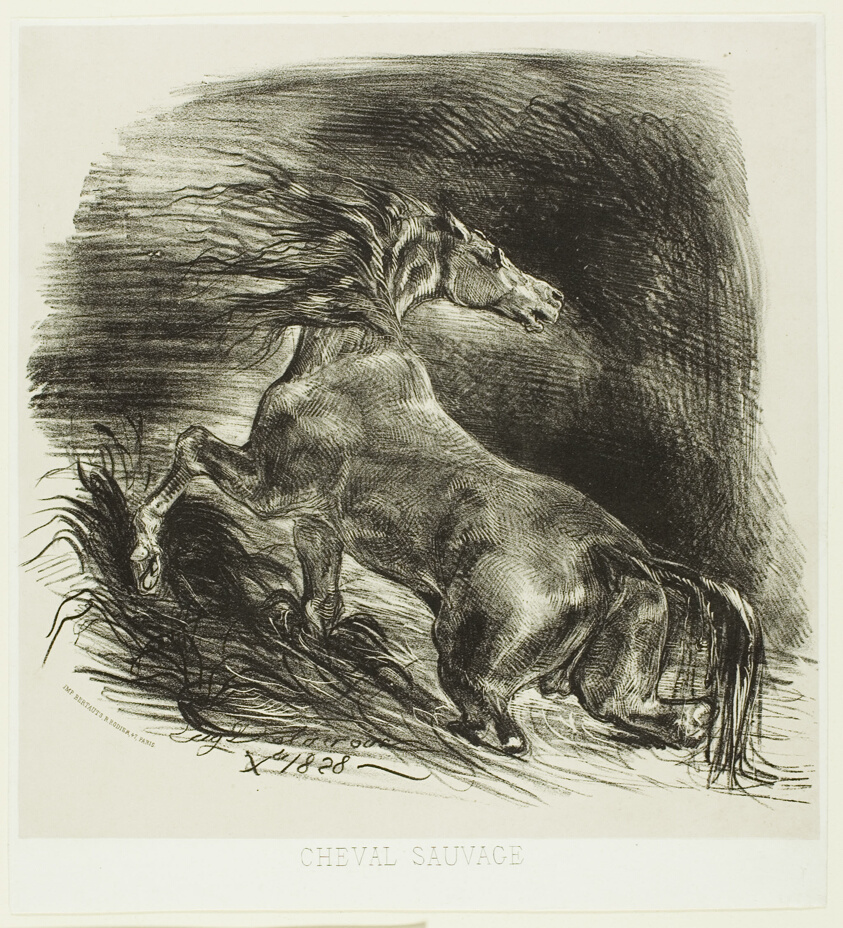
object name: Print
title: Wild Horse or Frightened Horse Leaving the Water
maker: Eugène Delacroix (French, 1798-1863)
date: 1828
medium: Lithograph from two stones in buff and black on white wove paper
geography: France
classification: lithograph; print; prints and drawing